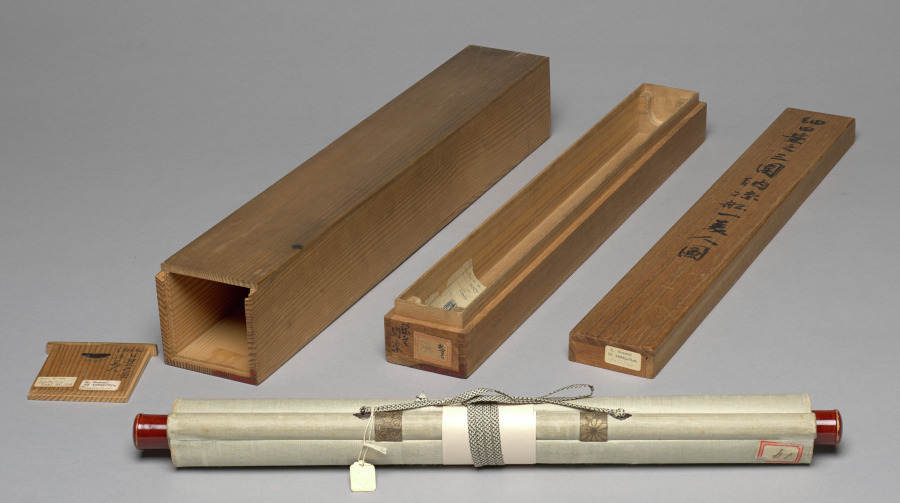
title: Beauty in a Boat on Sumida River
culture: Japan, Edo period (1615–1868)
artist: Chōbunsai Eishi (Japanese, 1756–1829)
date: c. 1801–4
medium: hanging scroll; ink and color on silk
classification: Painting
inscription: artist's signature 栄之筆 and seal, lower right.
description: The Sumida River was a popular refuge from the heat and humidity of the city during the summer. One can see the torii gate of Mimeguri Shrine just to the left of the woman's fan.